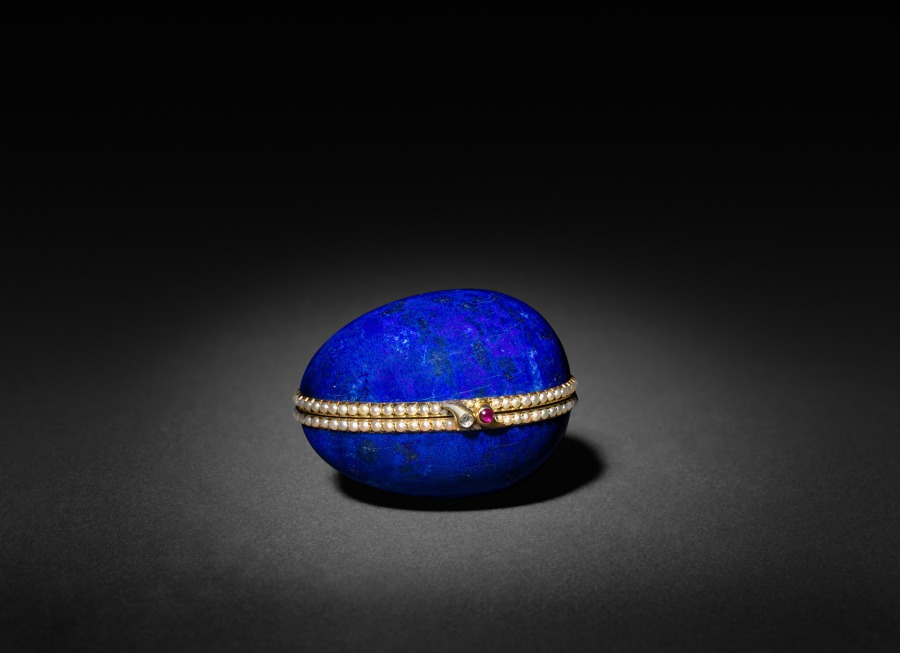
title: Lapis Lazuli Easter Egg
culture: Russia, St. Petersburg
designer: attributed to Peter Carl Fabergé (Russian, 1846–1920)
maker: attributed to House of Fabergé (Russian, 1842–1918)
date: c. 1885–90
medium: gold, enamel, lapis lazuli, pearls, diamonds, rubies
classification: Miscellaneous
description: Peter Carl Fabergé became the crown jeweler to the imperial court of Russia after he produced the very first Easter egg for Tsar Alexander III to give to his wife, Empress Marie Feodorovna. Fabergé created his celebrated Easter eggs, symbols of rebirth and renewal, as gifts for the Russian imperial family every year until he had to leave the country in 1919 after the Russian Revolution. Made of gold and lapis lazui from the Ural Mountains, this egg conceals a delightful surprise within of an imperial crown and a tiny ruby or pink sapphire on a chain.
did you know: This egg may have been made for one of the tsar's relatives very early in the run of Fabergé's production of Easter eggs.